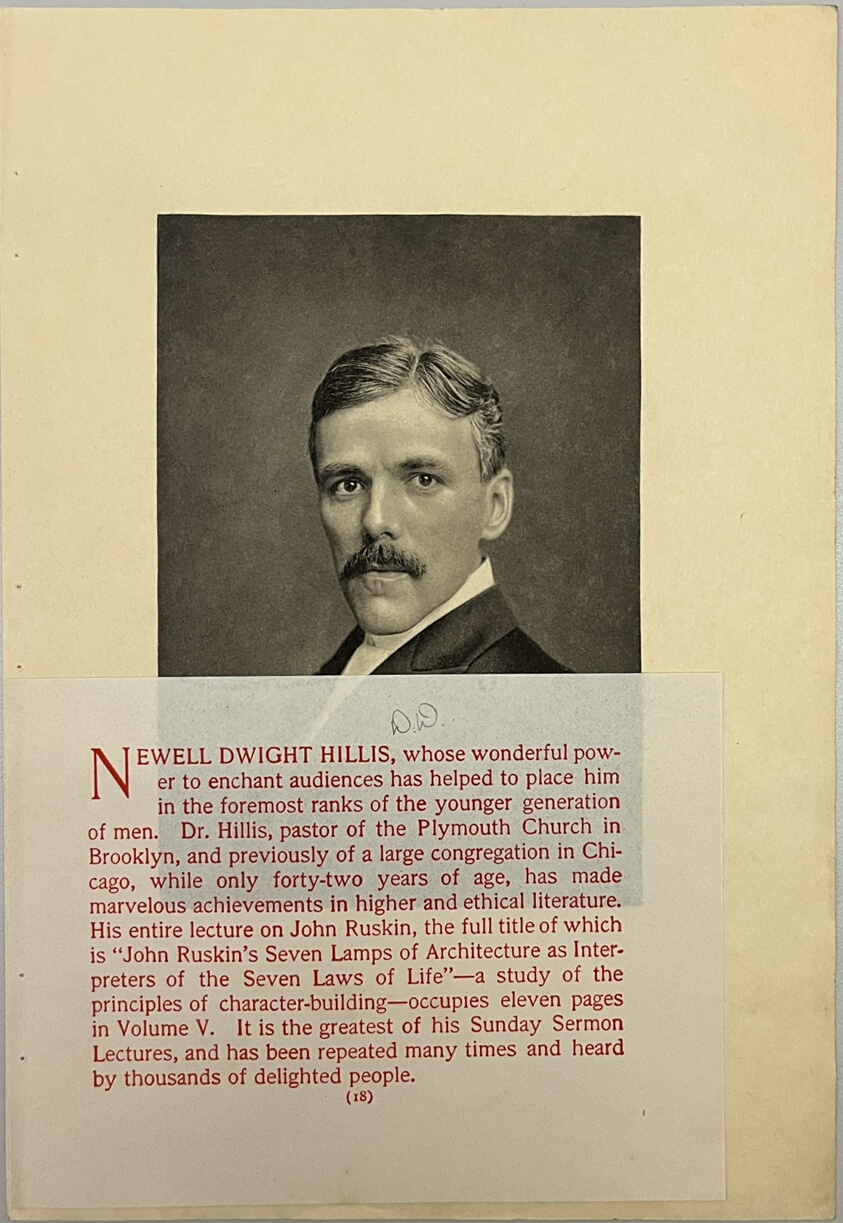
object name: Print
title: Newell Dwight Hillis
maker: Artist Unknown (Likely American, 19th century)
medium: Etching on paper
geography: United States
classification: reproduction; print; prints and drawing